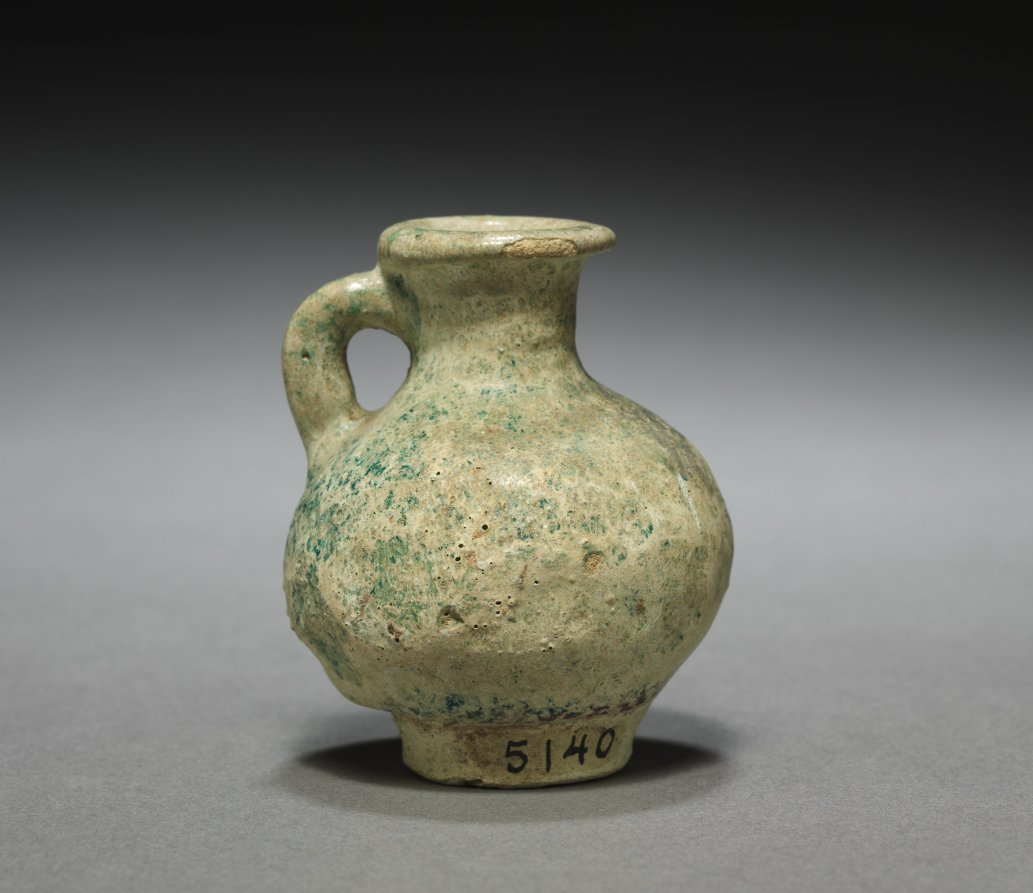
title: Jar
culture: Parthian Empire (247 BCE–224 CE)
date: 1–200 CE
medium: terracotta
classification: Ceramic